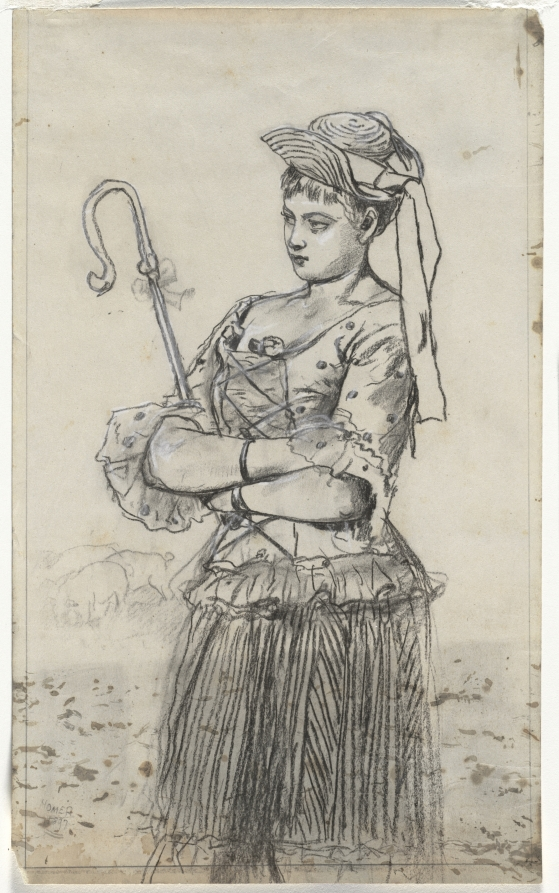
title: Shepherdess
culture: America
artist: Winslow Homer (American, 1836–1910)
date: c. 1878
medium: charcoal with brush and brown wash, heightened with white chalk; framing lines in graphite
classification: Drawing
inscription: [falsely signed?], lower left, in graphite: HOMER / 1897 ; VERSO, center left, in black crayon : 62 [within a square]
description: Homer spent the summer of 1878 at Mountainsville, New York, where his brother's business partner, Lawson Valentine, had a country place called Houghton Farm. While there he developed pastoral images of shepherdesses. The flirtatious quality of these depictions becomes intriguing when we consider that Homer never married, and that he worked not only from female models but also sometimes from boys in girls' clothing.